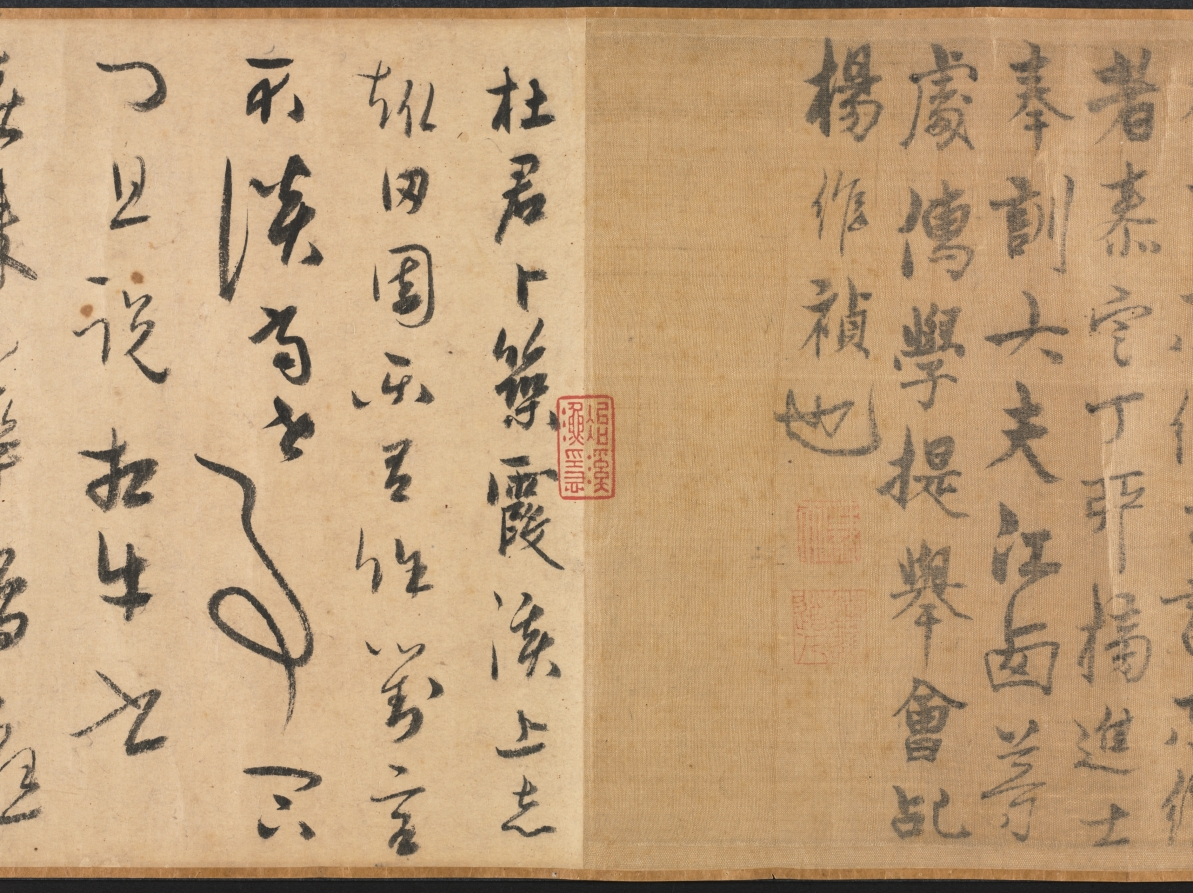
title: Leisure Enough to Spare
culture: China, Yuan dynasty (1271-1368)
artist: Yao Tingmei (Chinese, active mid-1300s)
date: 1360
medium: handscroll, ink on paper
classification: Painting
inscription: 至正廿年春正月_日作此併系鄙語于尾 地偏人遠閉柴關，滿院松陰白晝閒。 眼底風塵渾忘却，坐看流水臥看山。 吳興姚廷美畫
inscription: 23 colophons and 53 seals (dates unavailable for some): 1 colophon, dated 1360, and 2 seals of Yang Weizhen (1296-1370); 1 colophon and 3 seals of Wan Yi; 1 colophon of Zhang Junde; 1 colophon and 3 seals of Angji (act. ca. mid-14th c.); 1 colophon and 1 seal of Xu Shiquan; 1 colophon and 3 seals of Gao Yu; 1 colophon and 2 seals of Li Mingfu; 1 colophon and 2 seals of Lu Lin; 1 colophon and 1 seal of Zhang Qian; 1 colophon of Tao Tangwen; 1 colophon and 1 seal of Wu Yuangui (act. ca. 1300-60); 1 colophon of Bao Jiong; 1 colophon of Wang Zao; 1 colophon and 1 seal of Ma Chuyi; 1 colophon and 1 seal of Lin Yizhuang; 1 colophon and 1 seal of Gu Shunju; 1 colophon and 2 seals of Wang Jing; 1 colophon and 2 seals of Lin Shouchang; 1 colophon and 1 seal of Gao Zhidao; 1 colophon of Lin Xun; 1 colophon, dated 1359, and 2 seals of Meng Weicheng (act. mid-14th c.); 1 colophon and 1 seal of Meng Zhiji (act. mid-l4th c.); 14 seals of Liang Qingbiao 梁清標 (1620-1691); 1 poem dated 1755 and 5 seals of the Qianlong 乾隆 emperor (r. 1736-95); 2 seals of the Jiaqing 嘉慶 emperor (r. 1796-1821); 3 seals of the Xuantong 宣統 emperor (r. 1909-11).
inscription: Title on frontispiece by Zhang Bi 章弼: Signed Gongchen 拱辰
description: Seclusion and leisure—the ideals of the literati, or scholar-gentlemen—are expressed in this mature work by Yao Tingmei. The theme acquired special meaning at a time of the military uprisings near the end of the Yuan dynasty. Dedicated to an ascetic named Du, this work combines painting, calligraphy, and poetry; following the painting are more than 20 poems and essays written by notable scholars, one of whom was the calligrapher Yang Weizhen. It reveals not only the aesthetic taste of the literati but also the practice of contributing artistic and literary works to fulfill social obligations. Yao's painting demonstrates his individual style derived from various ancient masters (Guo Xi, Dong Yuan, and Juran). Yang Weizhen's calligraphy exhibits his bold, vigorous style and his intent to capture the spirit of antiquity in art.